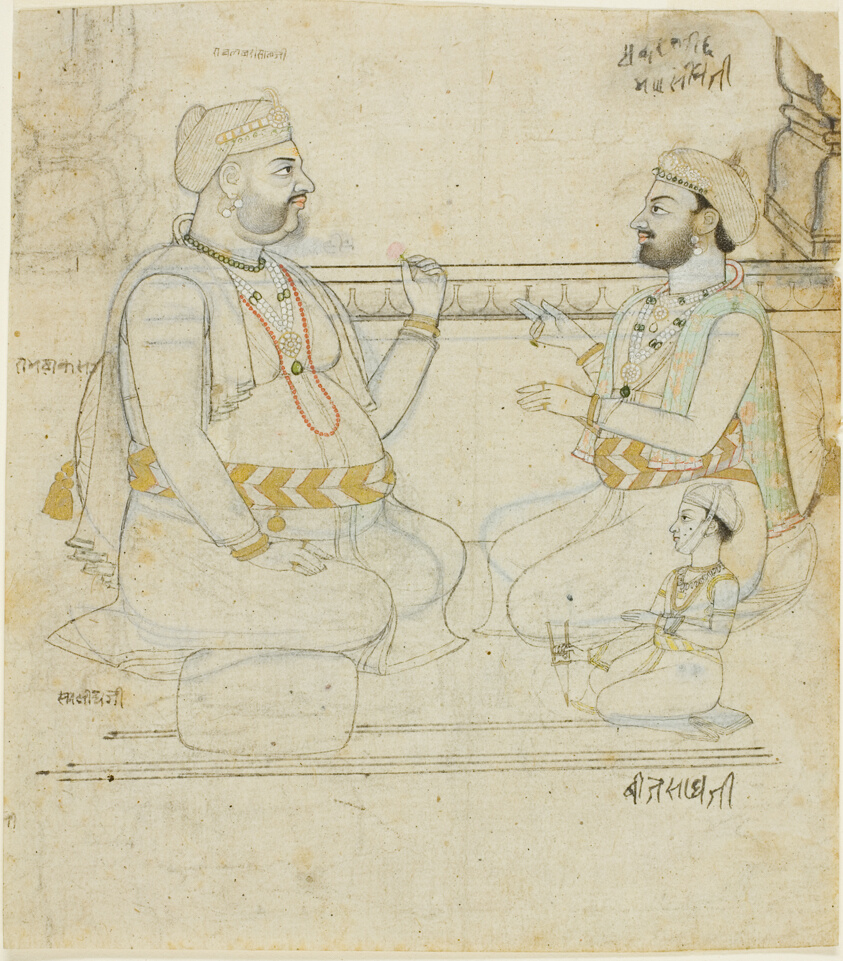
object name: Painting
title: Two Rajput Noblemen with a Child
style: South Asian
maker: India; Rajasthan, Jaipur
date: Late 18th century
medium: Ink, color and gold on paper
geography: India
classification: miniature painting; painting; asian art